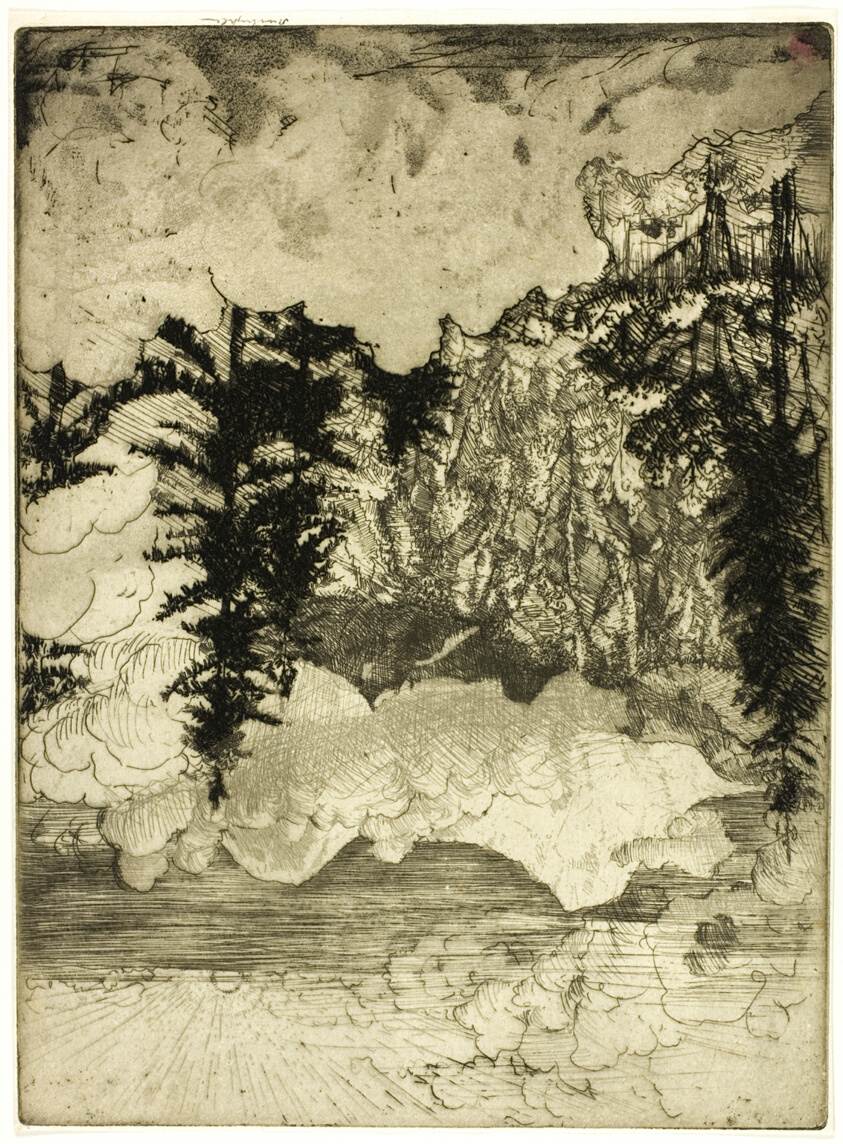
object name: Print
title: The Two Pines, Switzerland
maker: Donald Shaw MacLaughlan (American, born Canada, 1876-1938)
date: 1908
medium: Etching in black on cream laid paper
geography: United States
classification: etching; print; prints and drawing